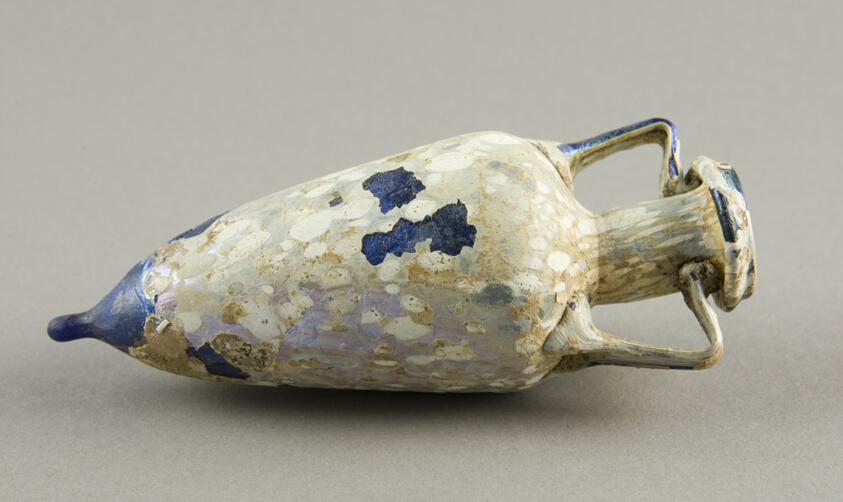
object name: Vessel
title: Amphora (Storage Jar)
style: syrian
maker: Roman; Levant or Syria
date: 1st-2nd century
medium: Glass, blown technique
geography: Syria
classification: glass; vessel; ancient art